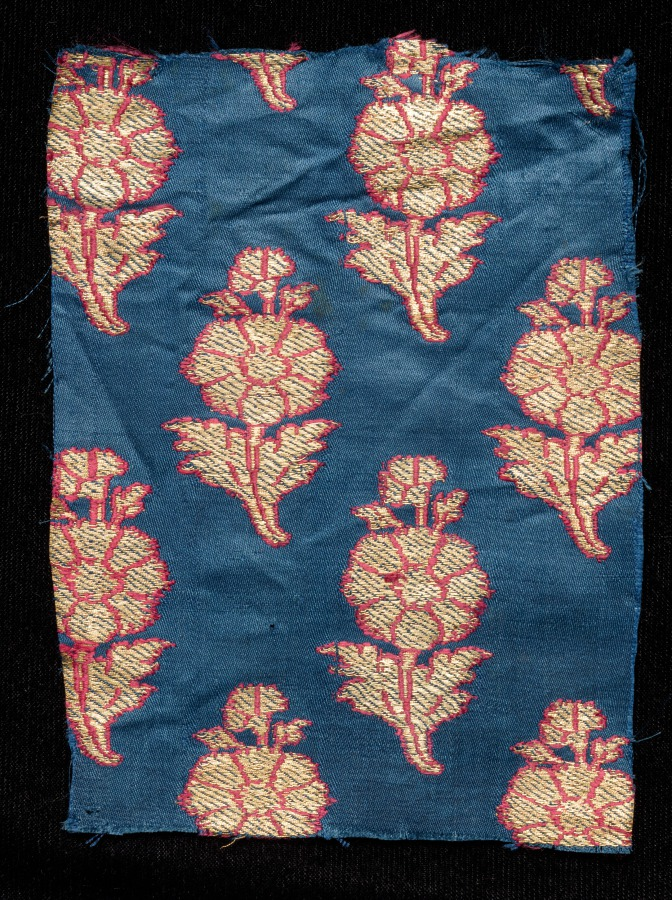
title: Brocade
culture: India, Benares ?, 19th century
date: 1800s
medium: brocade, "kimkhwab"; silk and gold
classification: Textile